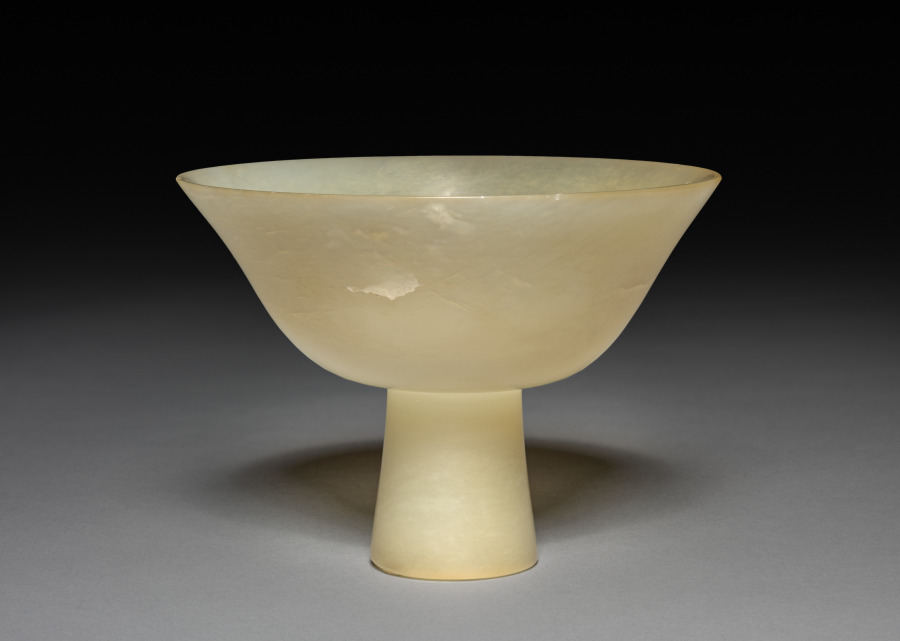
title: Stem Cup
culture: China, Ming dynasty (1368–1644)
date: 1368–1644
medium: white jade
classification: Jade